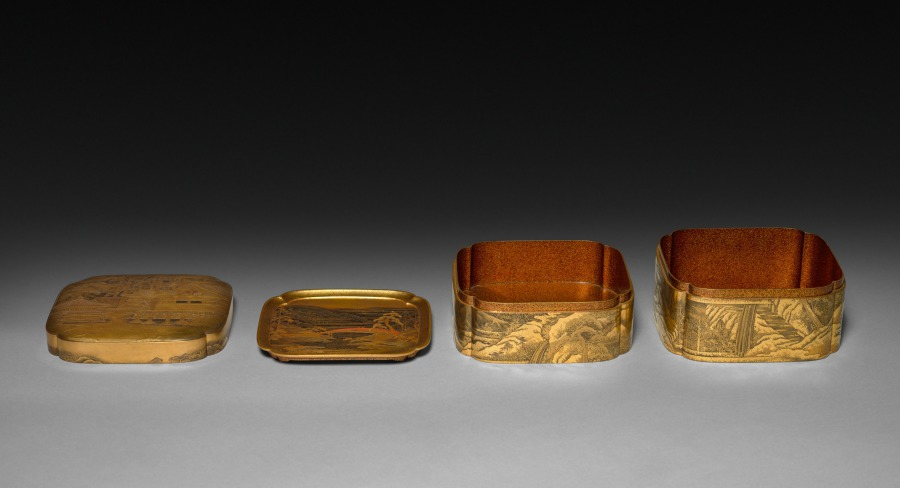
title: Covered Box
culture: Japan, Meiji period (1868–1912)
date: late 1800s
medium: wood with lacquer and gold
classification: Lacquer